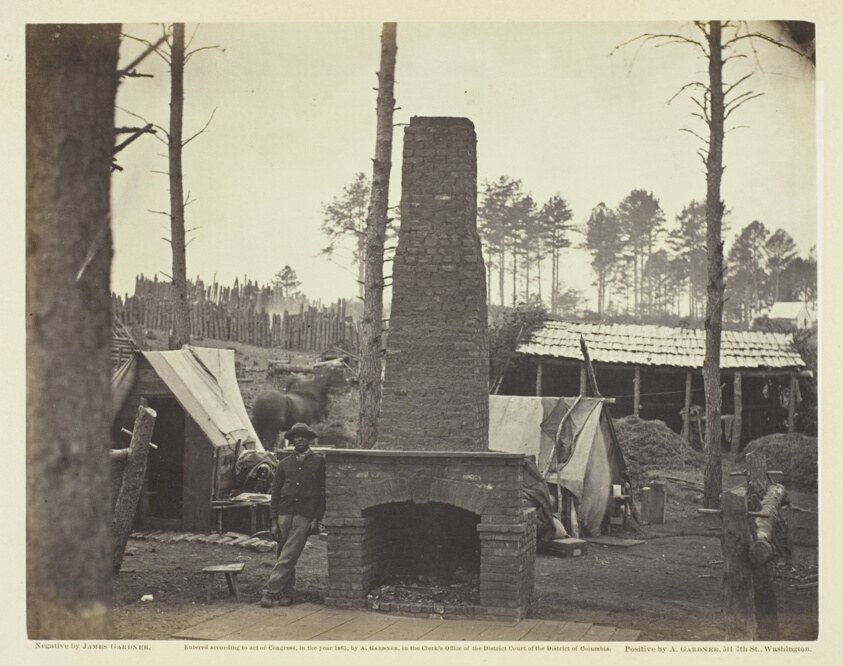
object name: Photograph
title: Incidents of the War: Breaking Camp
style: 19th century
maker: James Gardner (American, born Scotland, 1832–after 1865)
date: May 1864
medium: Albumen print, pl. 63 from the album "Gardner's Photographic Sketch Book of the War, Volume II" (1866)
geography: United States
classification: photograph; albumen silver print; photography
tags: Collected by Hugh Edwards, Gardner's Photographic Sketch Book